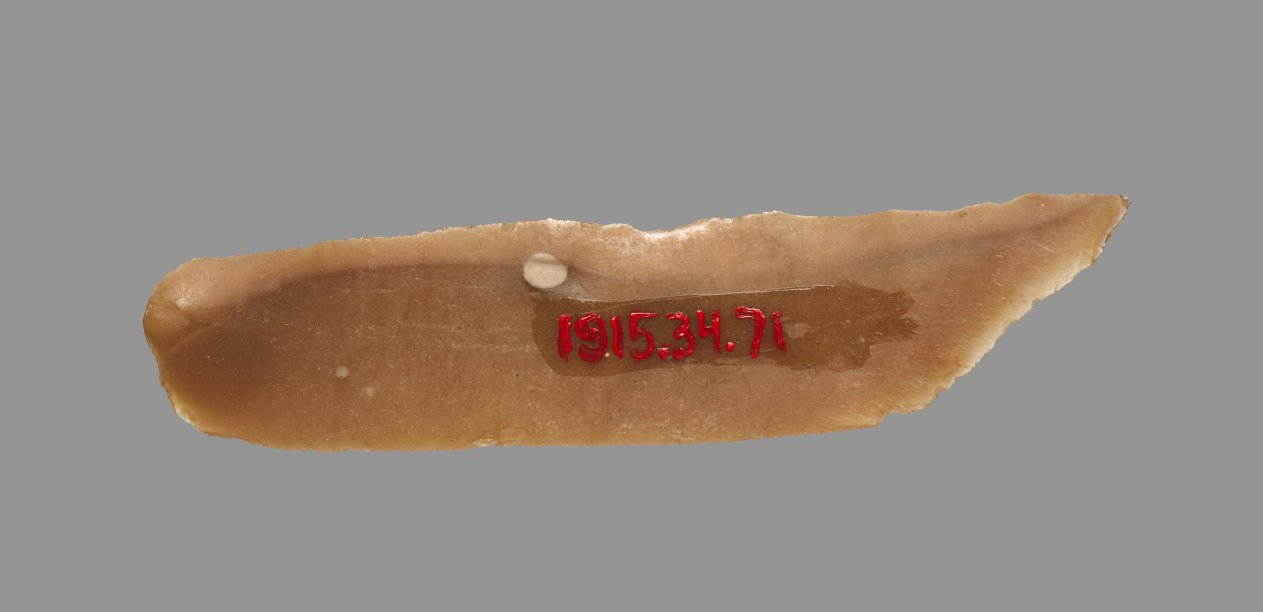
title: Sickle Blade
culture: Egypt, Middle Kingdom (2040–1648 BCE), Dynasty 12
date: 1980–1801 BCE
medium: flint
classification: Implements